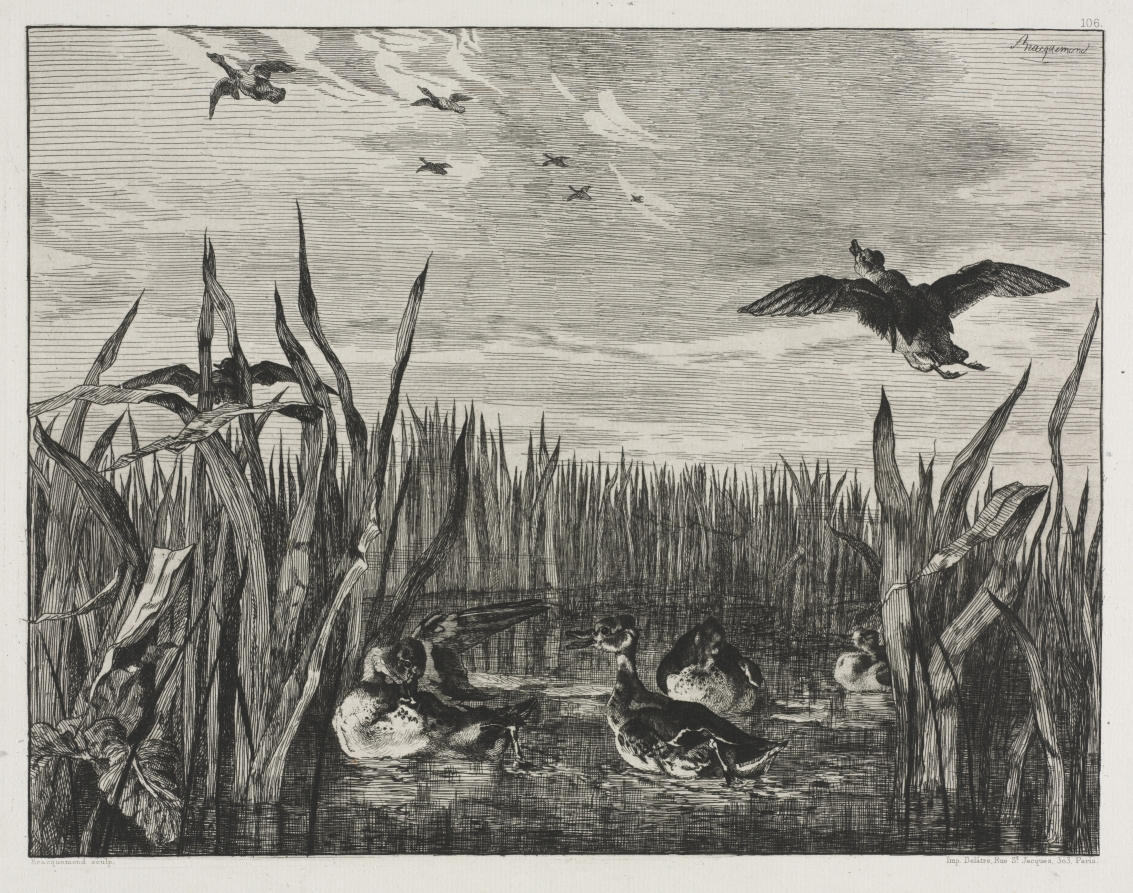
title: Teals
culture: France, 19th century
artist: Félix Bracquemond (French, 1833–1914)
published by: Cadart & Luquet, 79, rue Richelieu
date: 1853 (printed 1864)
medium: etching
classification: Print